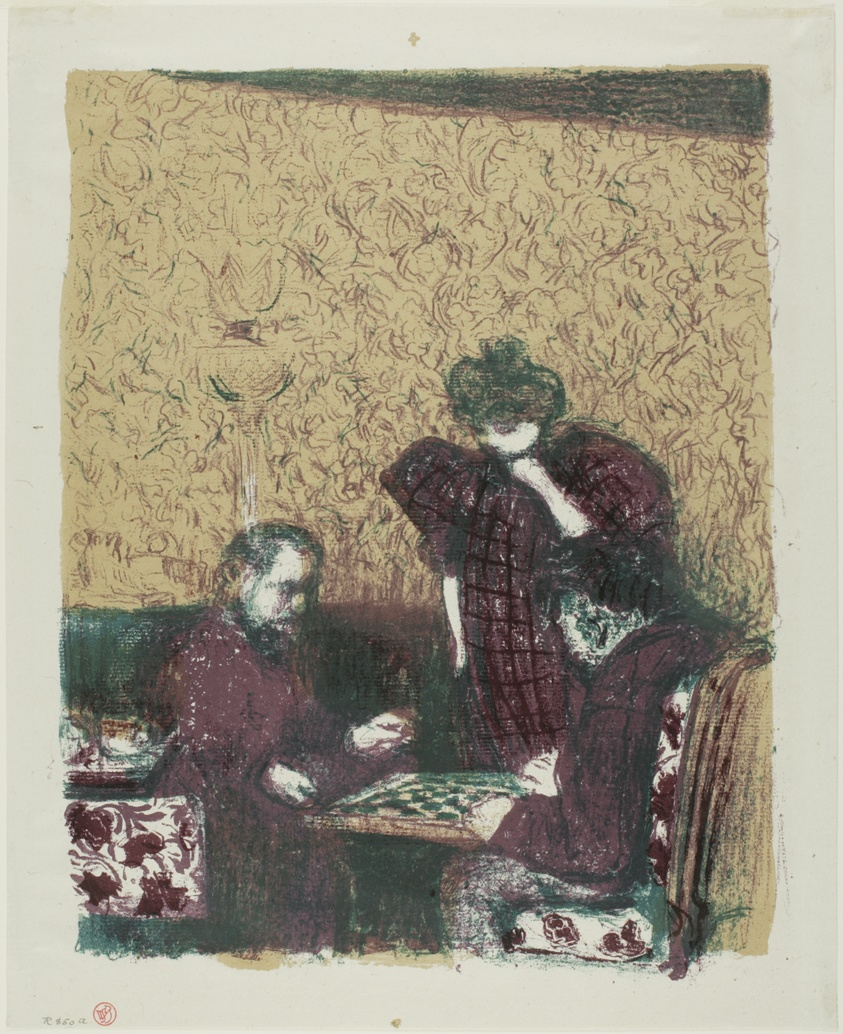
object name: Print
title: The Game of Checkers, plate one from Landscapes and Interiors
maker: Edouard Vuillard (French, 1868-1940); printed by Auguste Clot (French, 1858-1936); published by Ambroise Vollard (French, 1867-1939)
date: 1899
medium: Color lithograph on grayish-ivory China paper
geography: France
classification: lithograph; print; prints and drawing